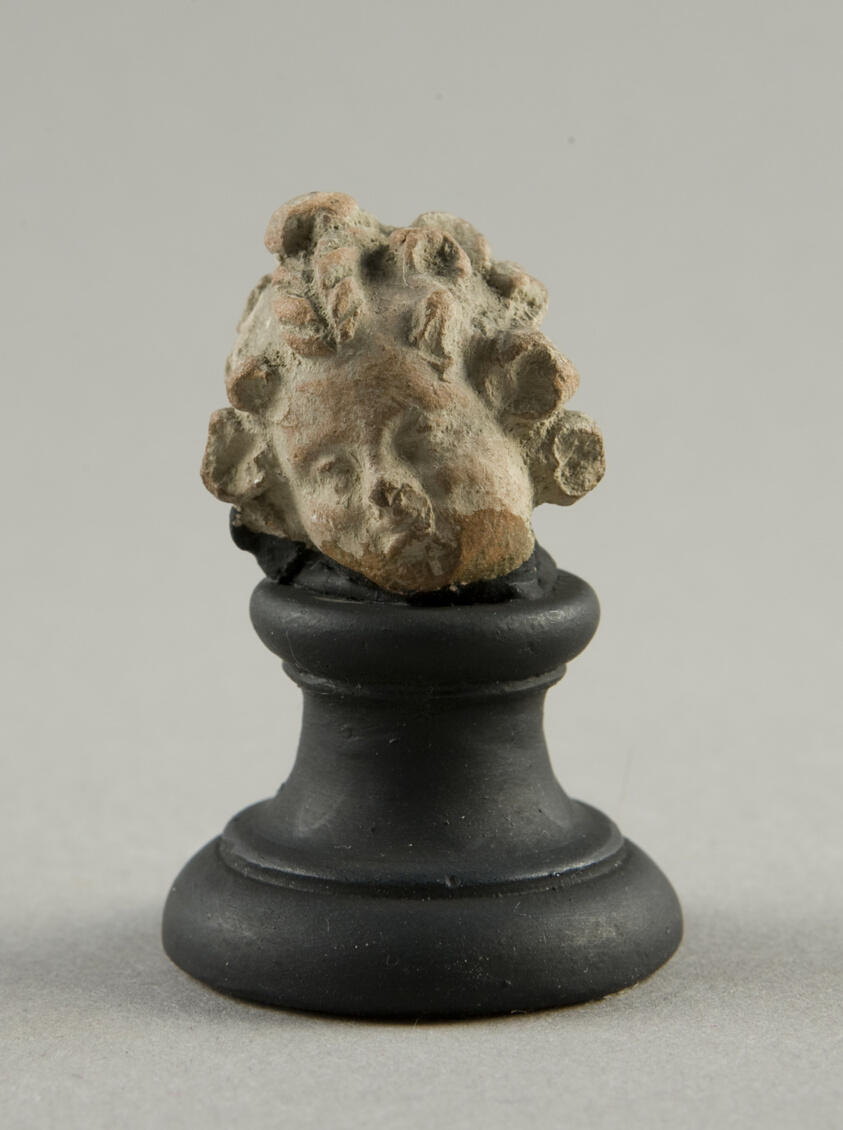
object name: Sculpture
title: Head of a Child or Woman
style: greek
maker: Greek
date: 2nd-1st century BCE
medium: terracotta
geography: Greece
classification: earthenware; ceramics; sculpture; ancient art